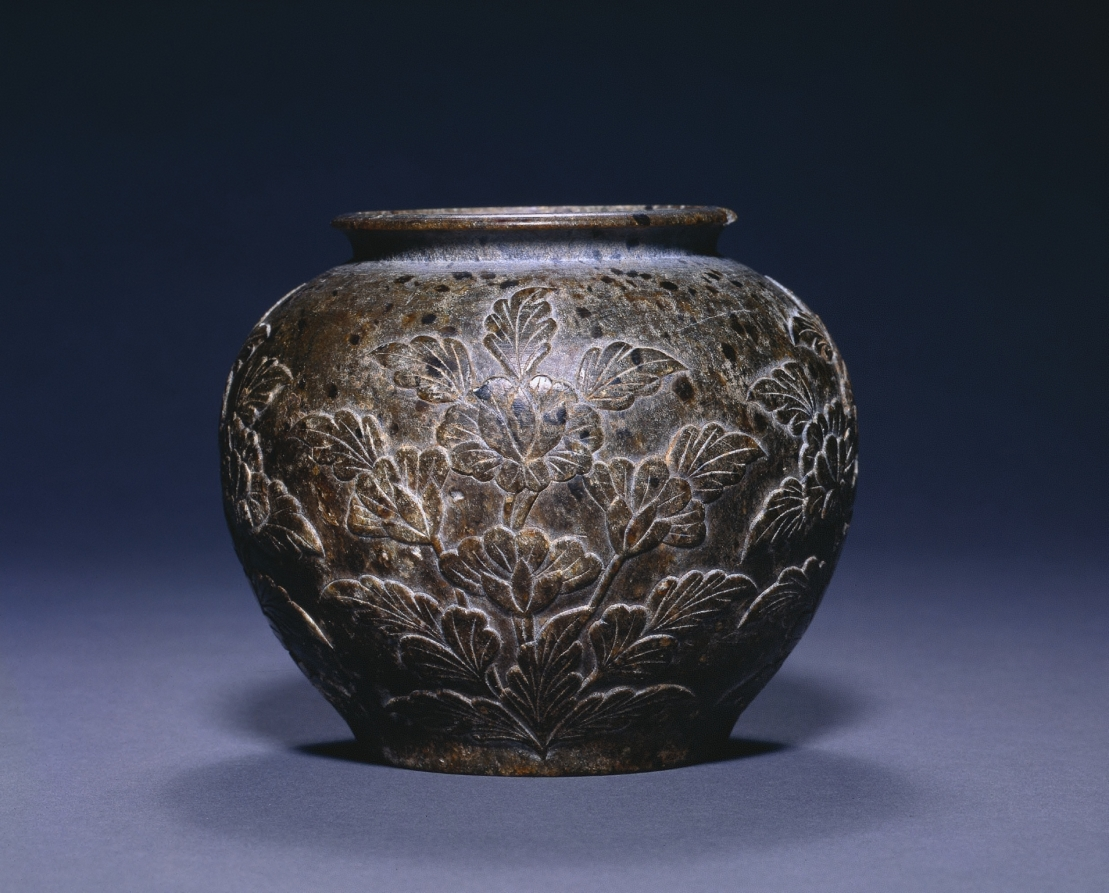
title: Jar with Floral Decoration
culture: China, Tang dynasty (618-907)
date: c. 700–750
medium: stone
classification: Stone